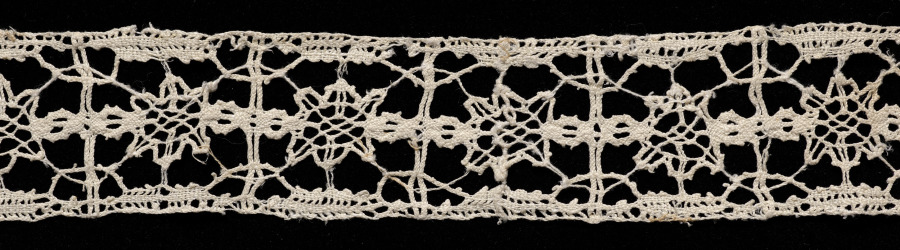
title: Lace Insertion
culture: Italy, Venice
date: late 1500s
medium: Bobbin lace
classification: Lace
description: This piece of bobbin lace is based on a needle lace (reticella) design, and is similar to another piece of bobbin lace in the CMA's collection: 1920.1192.